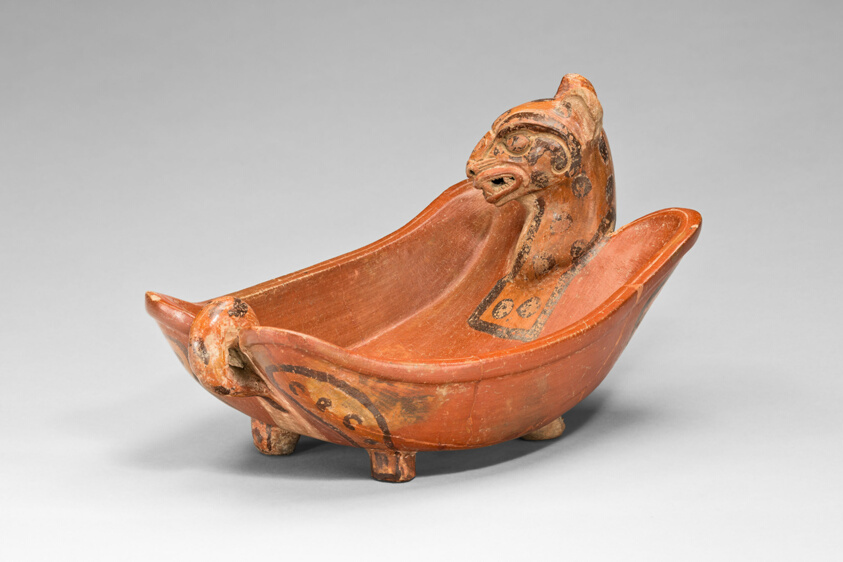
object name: Vessel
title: Open Bowl in the Form of a Jaguar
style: lower central america, Arts of the Americas, nicaragua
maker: Ometepe Island, Lake Nicaragua (Cocibolca), Nicaragua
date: 600–900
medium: Ceramic and pigment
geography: Isla de Ometepe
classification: bowl; art of the americas; ceramics; vessel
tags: animals